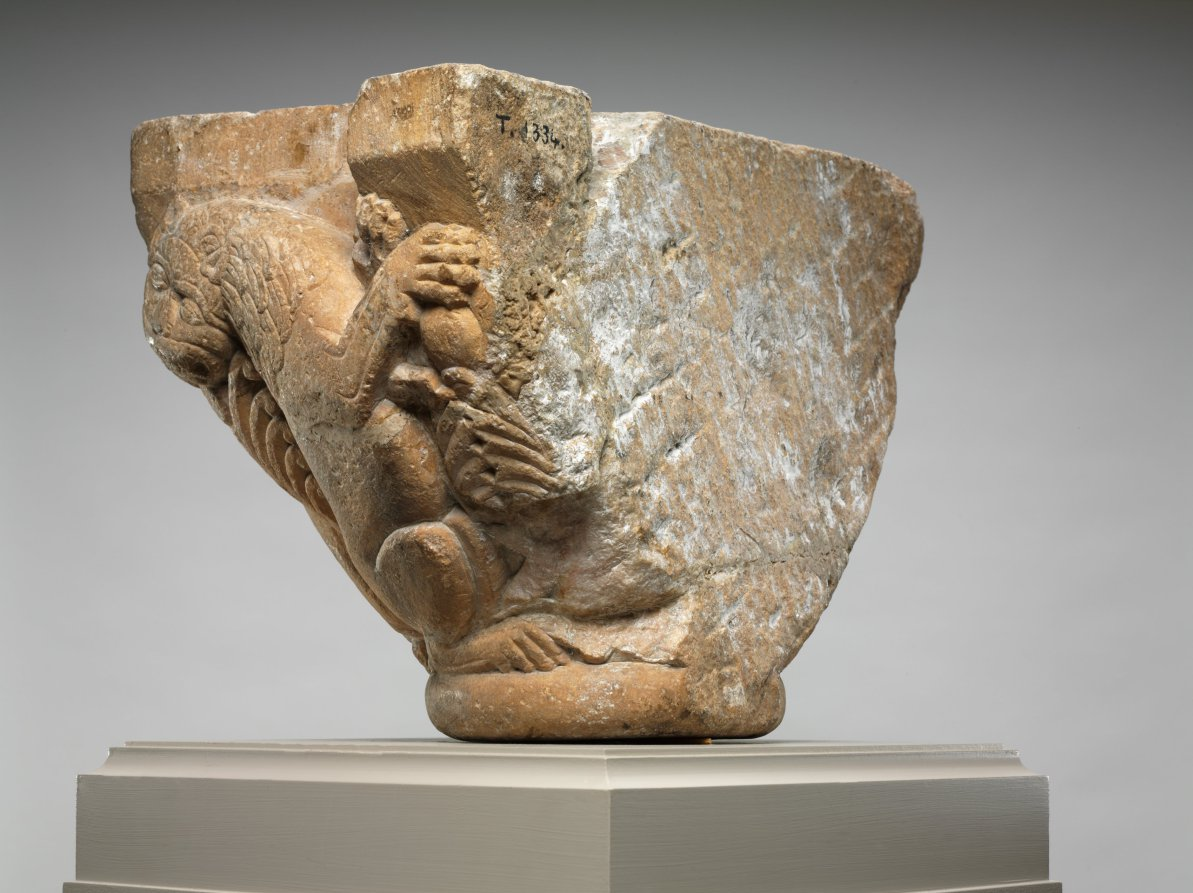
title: Engaged Capital with Lions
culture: Northern Spain (Navarre ?) or Southwest France (Pyrénées or Roussillon ?), mid-12th century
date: 1145–64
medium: marble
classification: Sculpture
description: The compositional motif of confronted and addorsed beasts illustrated on this capital was especially popular in churches along the pilgrimage roads.